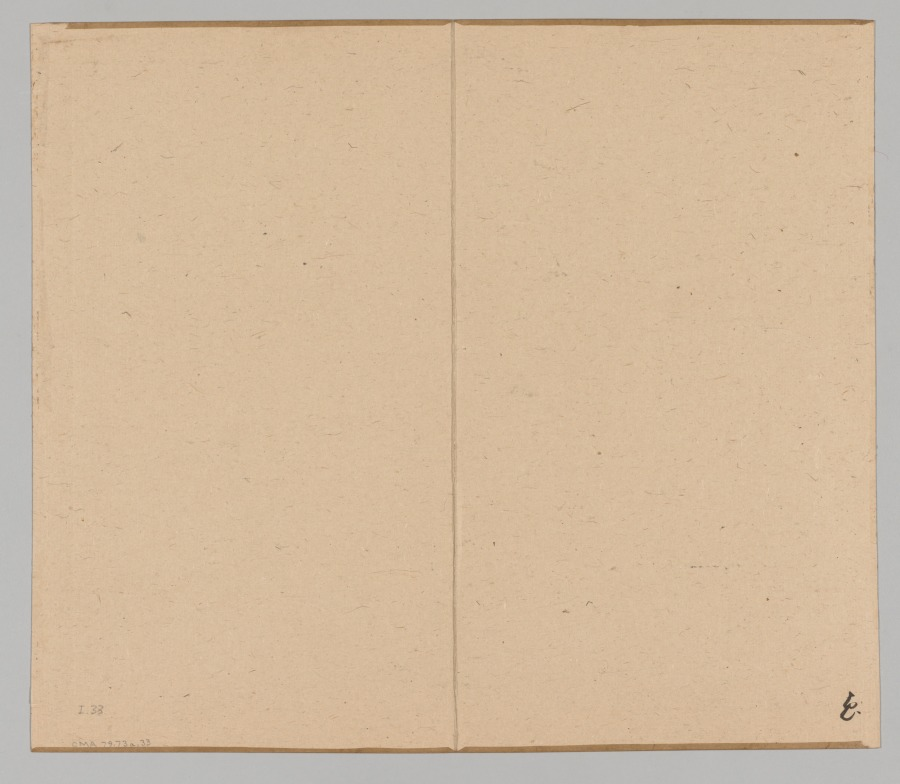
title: Reverberations of Taiga, Volume 1 (leaf 33)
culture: Japan, Edo period (1615–1868)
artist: Aoki Shukuya (Japanese, d. 1802)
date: mid- to late 1700s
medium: double-leaf from a pair of albums; ink and light color on paper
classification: Portfolio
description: Traditionally, young painters in Japan began their studies with an established master-painter. The master's compositions invariably became models that the apprentice copied to learn various ink and brush techniques. Shukuya was a pupil of the famous Kyoto artist Ikeno Taiga, whose style is reflected in these sketches of rocks, trees, and mountains.